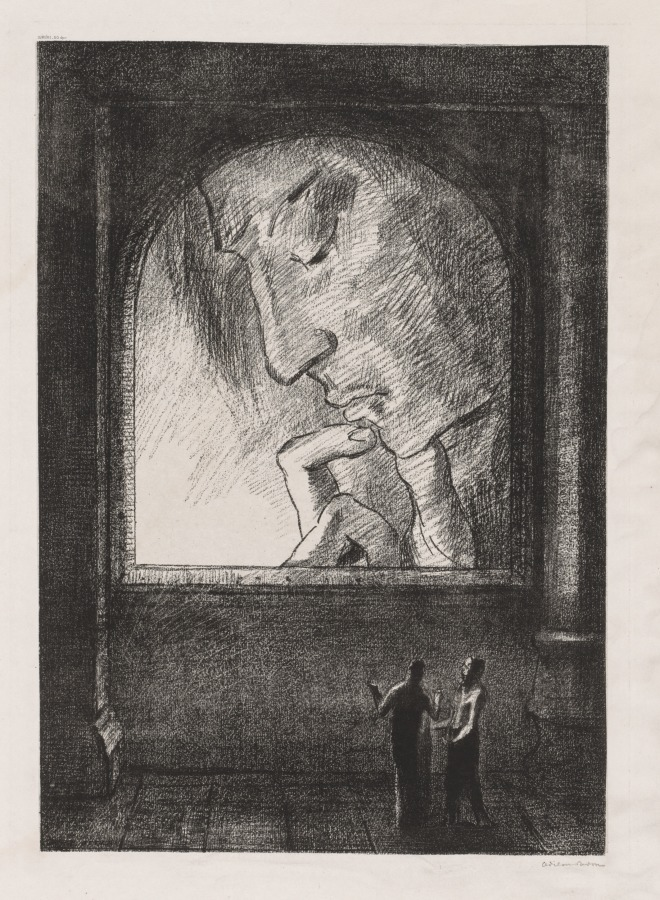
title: Light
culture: France, 19th century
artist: Odilon Redon (French, 1840–1916)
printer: Becquet (French)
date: 1893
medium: lithograph on China paper laid down on wove paper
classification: Print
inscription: signed on stone, lower left: ODILON REDON; printed above upper left corner of image: LUMIÈRE - 50 épr.; inscribed, lower right, below image, in graphite: Odilon Redon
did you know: Redon originally named this print "Pensive Head."